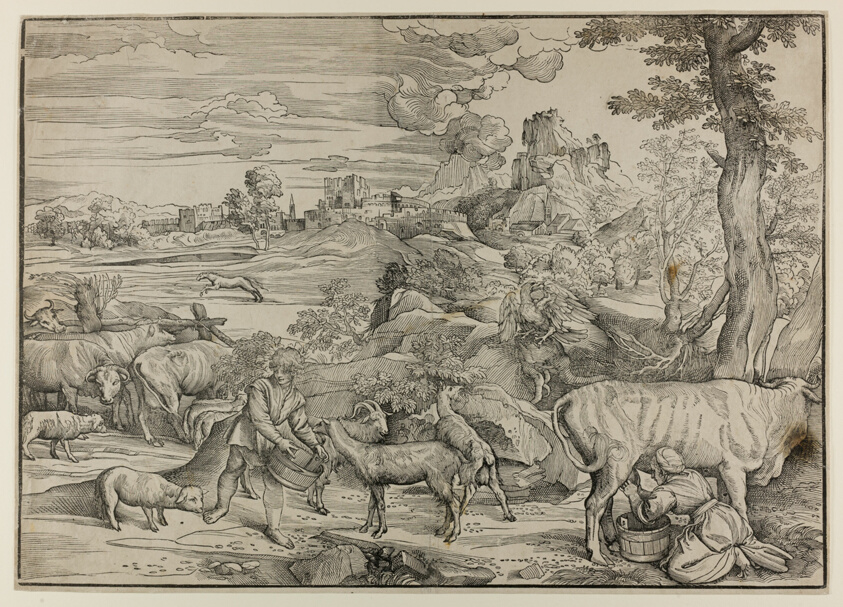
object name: Print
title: The Milkmaid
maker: Nicolò Boldrini (Italian, c. 1500–1566); after Titian (Italian, c. 1488-1576)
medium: Woodcut printed in black on paper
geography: Italy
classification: woodcut; print; prints and drawing